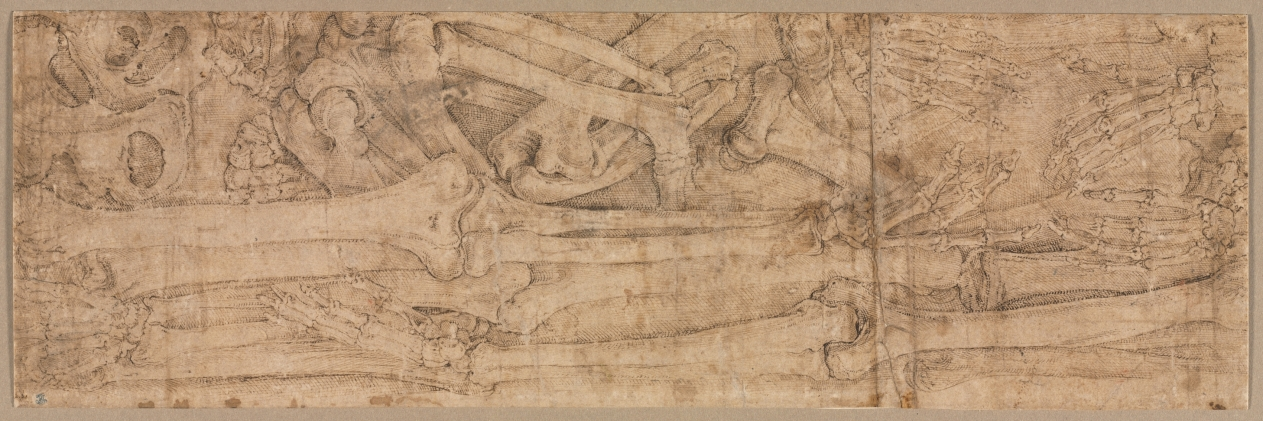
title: Arm Bones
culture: Italy, 16th century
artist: Battista Franco (Italian, c. 1510–1561)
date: early 1540s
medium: pen and brown ink with incised lines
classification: Drawing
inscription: VERSO OF SECONDARY SUPPORT, lower left, in graphite: 2.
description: Michelangelo was among the first artists in Europe to attend a human dissection and to adopt anatomical knowledge as a necessity for depicting the human figure. These drawings by Battista Franco reflect the increased—and slightly macabre—interest in the interior workings of the human body inspired in part by Michelangelo’s example. Here, the groupings of arm bones, though rendered accurately, are placed into decorative piles. The odd assembly vacillates between scientific study and a symbolic memento mori, or reminder of death.